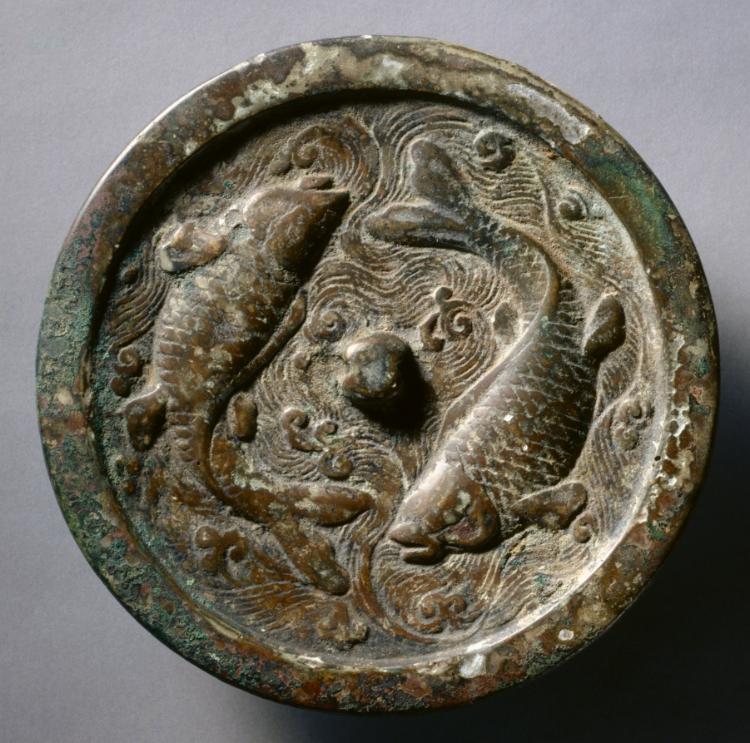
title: Mirror with Twin Carp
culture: China, Jin dynasty (1115-1234)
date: c. 1200–25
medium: bronze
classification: Metalwork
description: Mirror with Twin Carp, about 1200-25 China, Jin dynasty (1115-1234) CMA 1995.379 [Cat. no. 86]